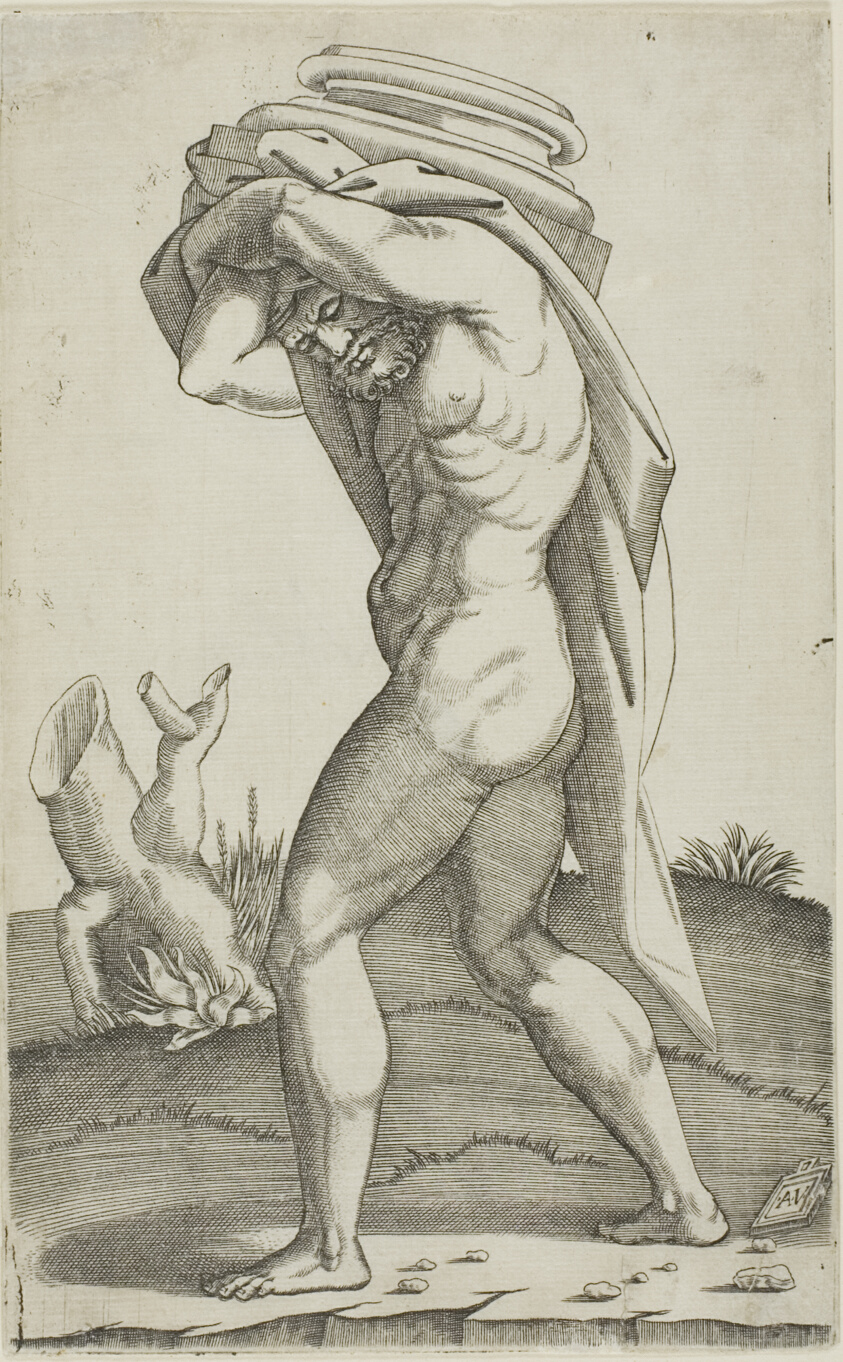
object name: Print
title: Man Carrying the Base of a Column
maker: Agostino dei Musi (Italian, c. 1490-after 1536); after Raffaello Sanzio, called Raphael (Italian, 1483-1520)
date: 1515/30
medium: Engraving in black on ivory laid paper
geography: Italy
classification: engraving; print; prints and drawing